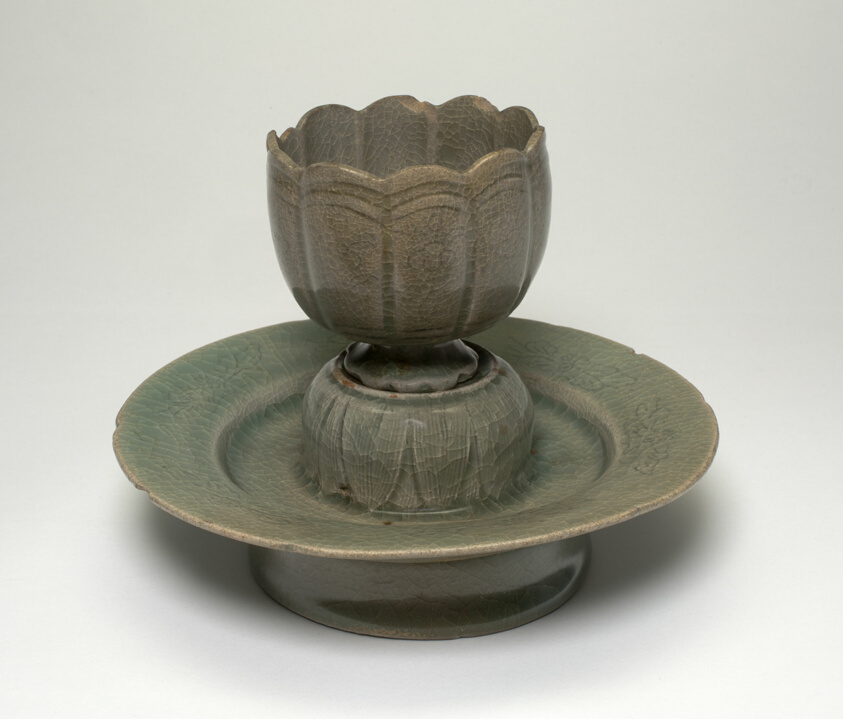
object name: Decorative Arts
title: Lobed Cup and Stand with Floral Sprays and Stylized Leaves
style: Korean (culture or style)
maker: Korea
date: Goryeo dynasty (918–1392)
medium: Celadon-glazed stoneware with underglaze carved and incised decoration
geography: Korea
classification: drinking vessel; asian art; ceramics; decorative arts